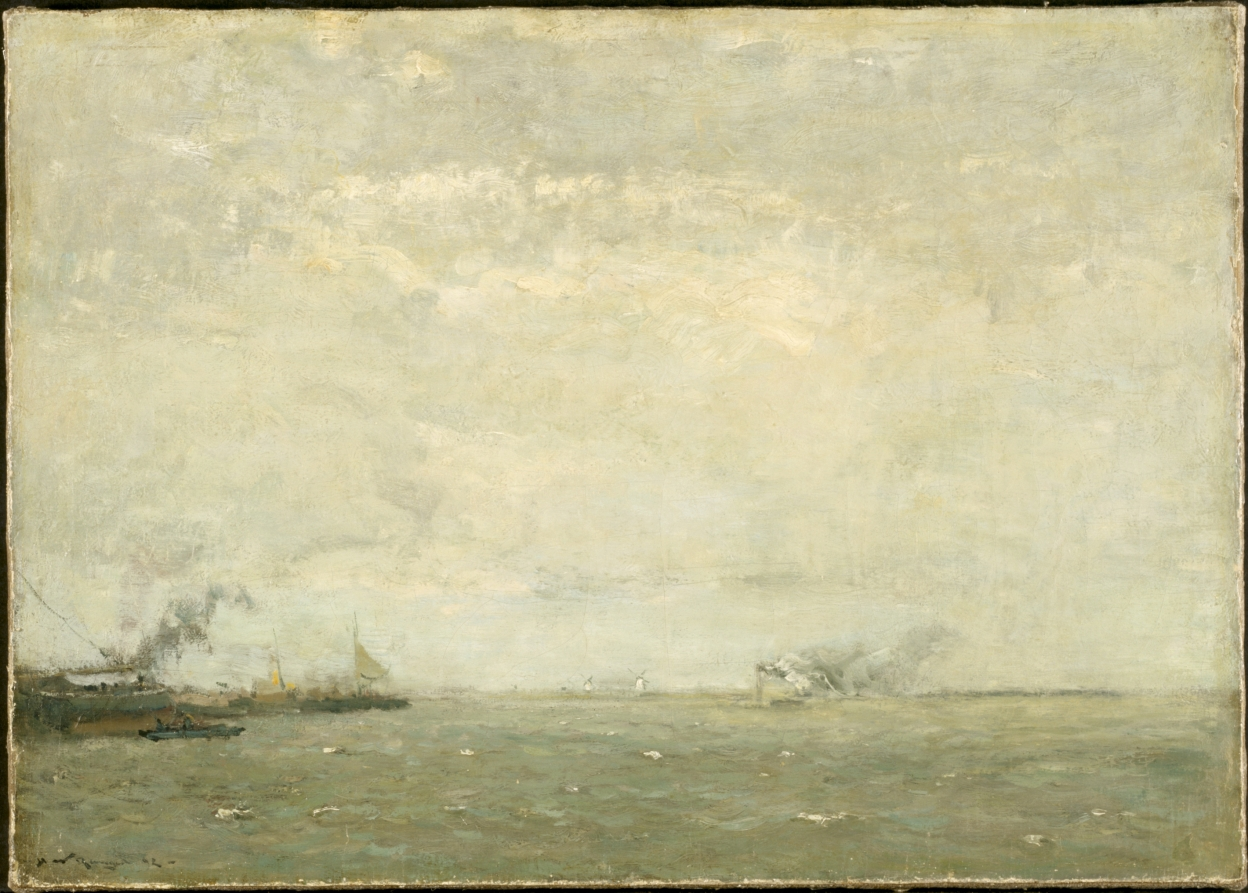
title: Seascape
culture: America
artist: Henry Ward Ranger (American, 1858–1916)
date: 1892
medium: oil on canvas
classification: Painting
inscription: Signed lower left: "Henry Ranger 92"